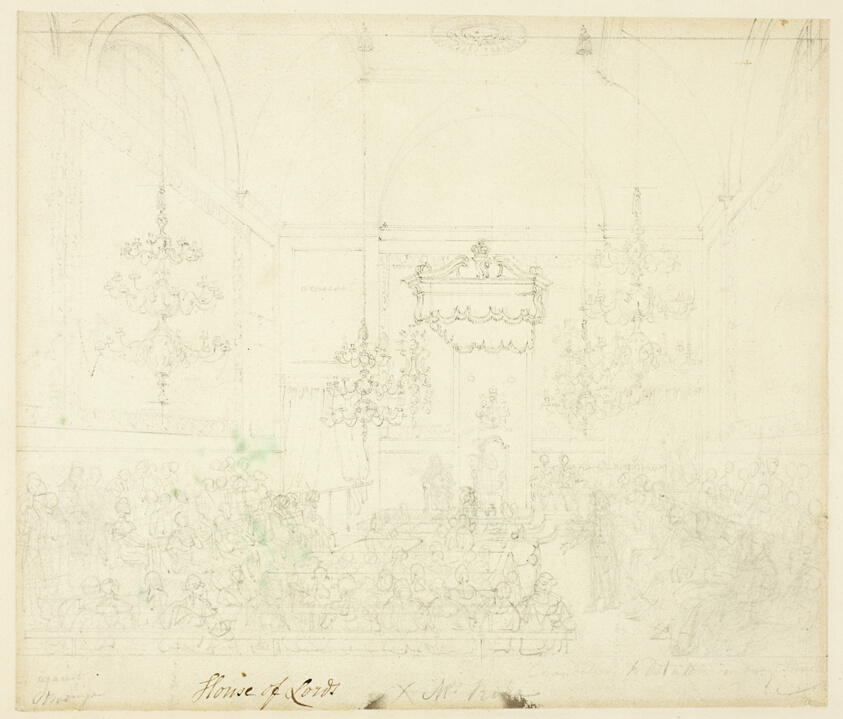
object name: Drawing and Watercolor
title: Study for House of Lords, from Microcosm of London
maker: Augustus Charles Pugin (English, born France, 1762-1832); Thomas Rowlandson (English, 1756-1827)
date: c. 1809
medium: Graphite on ivory wove paper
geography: England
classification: graphite; drawings (visual works); prints and drawing